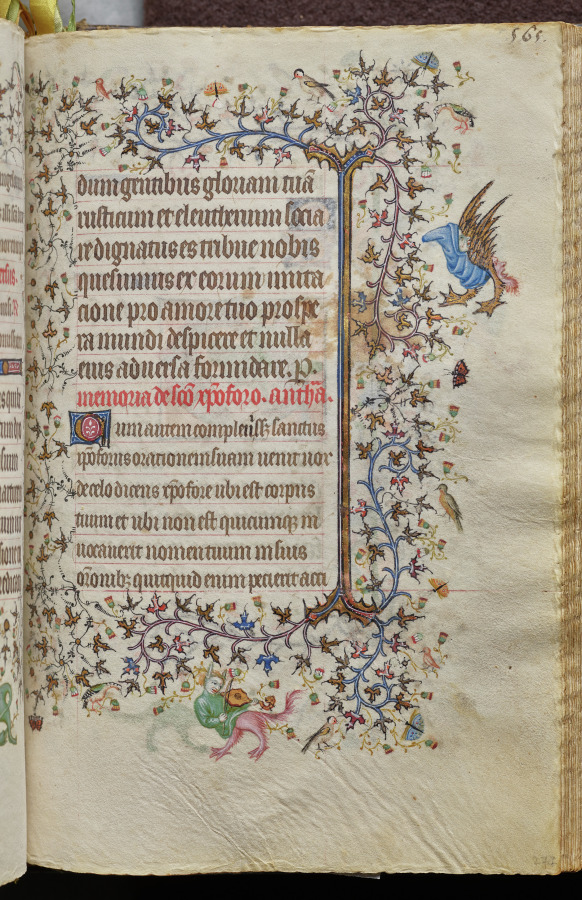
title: Hours of Charles the Noble, King of Navarre (1361-1425): fol. 277r, Text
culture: France, Paris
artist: Master of the Brussels Initials and Associates (French)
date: c. 1405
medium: ink, tempera, and gold on vellum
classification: Bound Volume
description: This precious volume was obviously highly prized by its owner, the French-born King of Navarre, who had his coat of arms painted on no less than twenty folios. Rather than directly commissioning this manuscript from a specific workshop, it seems that Charles the Noble acquired his book of hours -- perhaps ready-made for the luxury market -- while on a trip to Paris in 1404-05. A collaborative effort, six painting styles are evidenced within the pages of this codex, those of two Italians, two Frenchmen, and two Netherlanders. The painter who was responsible for the planning and decoration of the book, and who produced seventeen of the large miniatures, was a Bolognese artist known as the Master of the Brussels Initials. His principal assistant, responsible for most of the borders, was a Florentine who signed his name "Zecho" da Firenze on folio 208 verso.